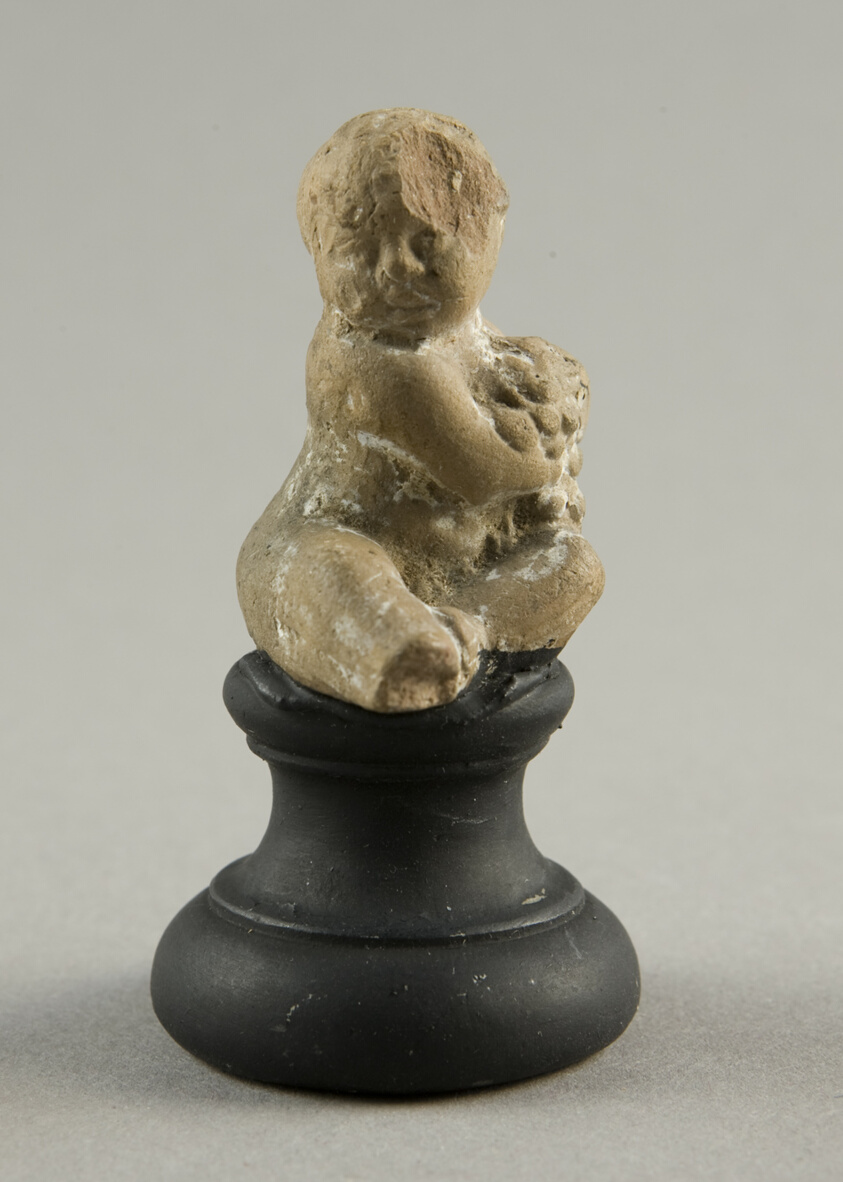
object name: Sculpture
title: Seated Child Holding Grapes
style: greek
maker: Greek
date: 3rd/2nd century BCE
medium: terracotta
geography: Greece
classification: earthenware; ceramics; sculpture; ancient art